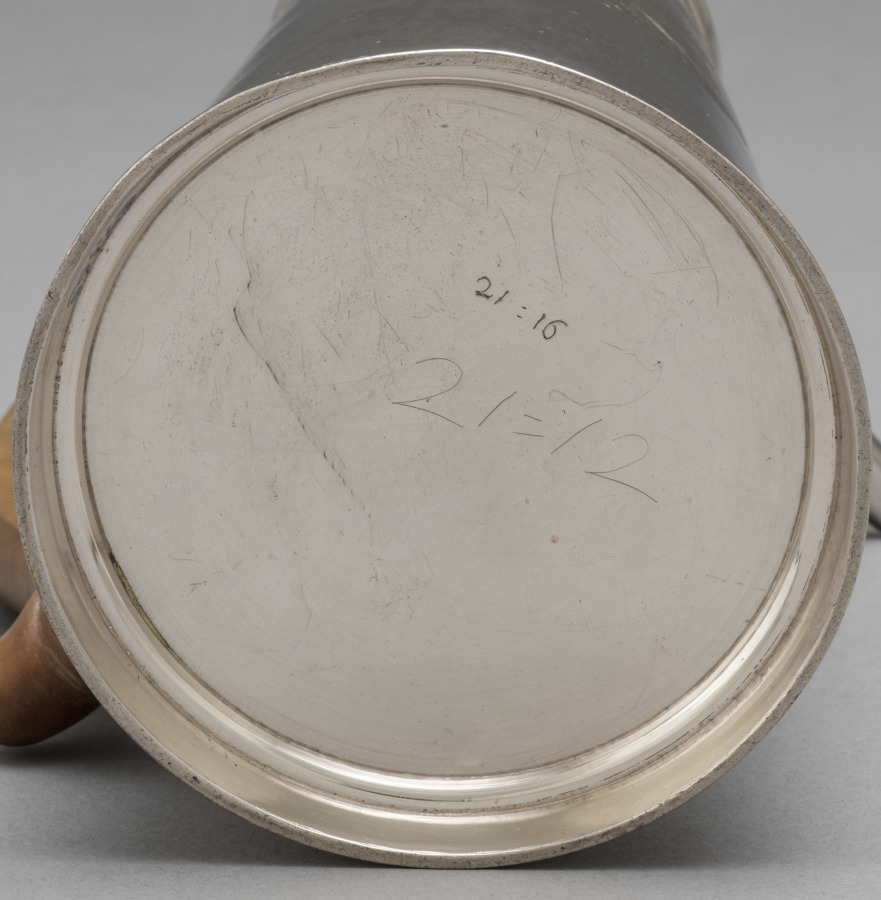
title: Coffee Pot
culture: England, London, 18th century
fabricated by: John Chartier (British)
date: 1702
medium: silver, wooden handle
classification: Silver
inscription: scratched on base: "21=16"; "21=12." Coat of arms engraved in contemporary mantling: oak tree with four lower branches beginning to sprout. (Arms of "Here" family.)